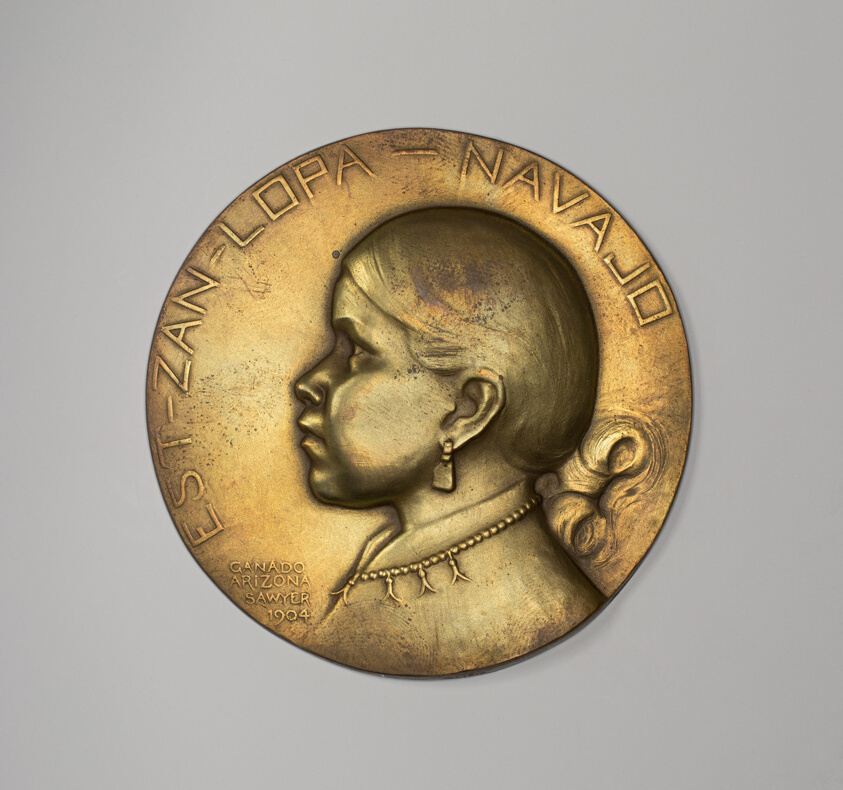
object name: Metalwork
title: Est-Zan-Lopa—Navajo Ganado Arizona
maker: Edward Warren Sawyer (American, 1876–1932)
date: 1904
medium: Bronze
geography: United States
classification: medal; american arts; decorative arts